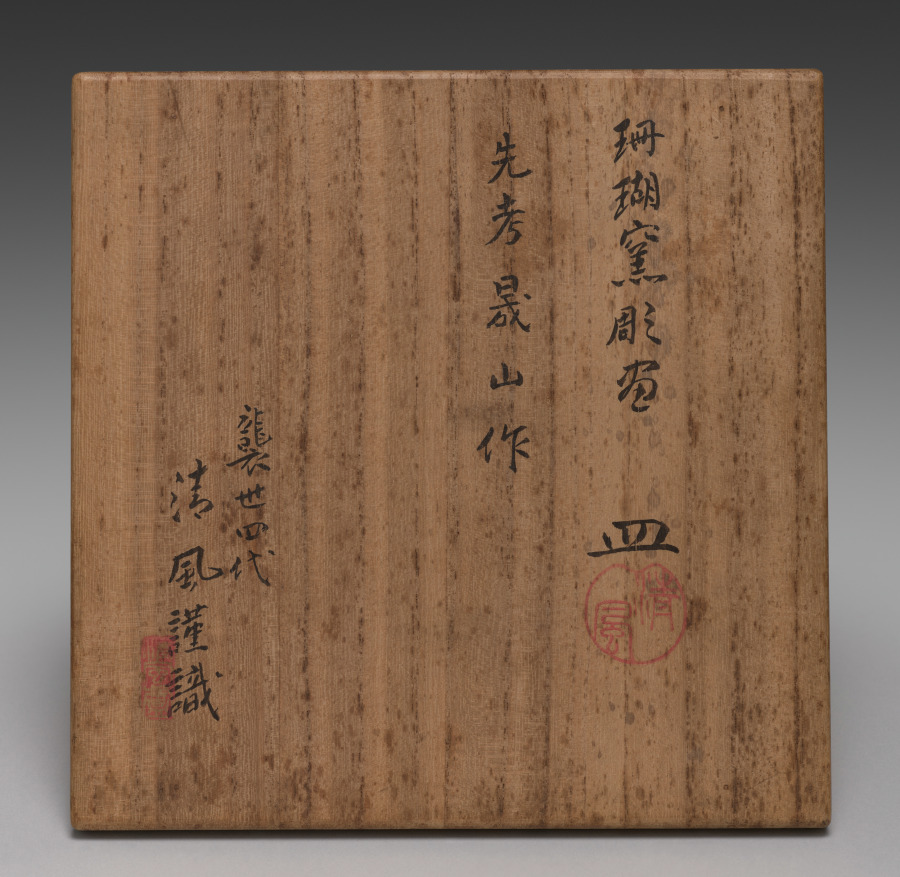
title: Dish with Carp in Waves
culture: Japan, Meiji period (1868–1912)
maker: Seifū Yohei III (Japanese, 1851–1914)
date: 1893–1914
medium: Porcelain with incised designs, iron oxide, and red glaze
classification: Ceramic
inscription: 清風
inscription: 清風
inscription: 清風盧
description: The exterior of this low, wide dish with flared foot is covered with a red coral glaze. Its interior is white with incised designs, and the rim is decorated with brown iron oxide. The primary design occupies the flat bottom of the bowl and is bound within a single band. It is of a carp swimming vigorously against roiling waves with frothy crests moving in multiple directions; the water just above the fish’s head is beginning to form a whirlpool. A closer look at the fish’s face reveals that it somewhat resembles that of a dragon. It is possible that the motif is meant to be a carp who jumps over the waterfall and transforms into a dragon, who flies into the sky. The iconography symbolizes the transformative experience of striving to one’s utmost and achieving the impossible against tough odds. Originating in China, the narrative’s visual representation as well as its meaning crossed the ocean to Japan, where it often appeared on items gifted to those celebrating pivotal successes in life, such as obtaining elevated status in one’s work or graduating from an academic program.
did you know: The inside walls of the bowl are decorated with three abstract flowers, each represented with five circles ringing a central circle, from which leafy tendrils stretch in both directions .